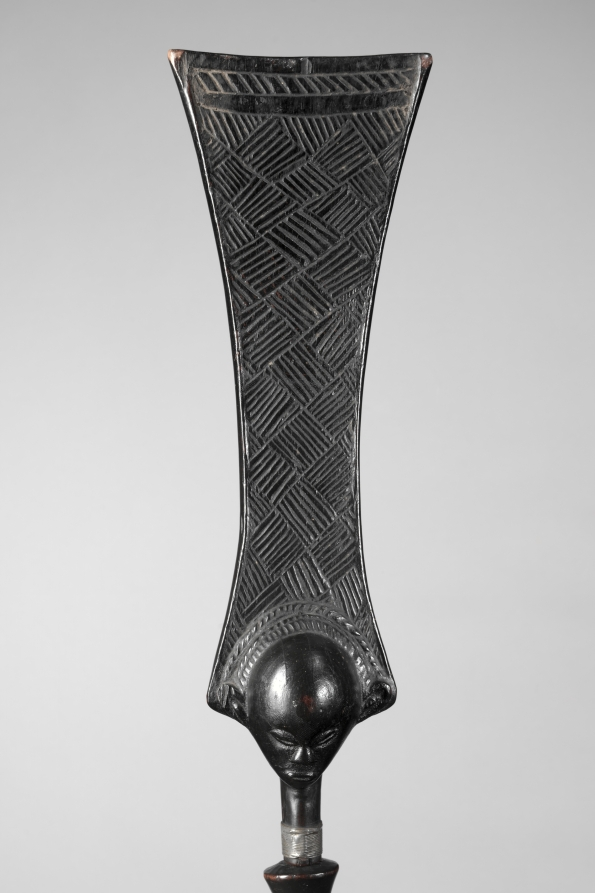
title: Staff of Office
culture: Central Africa, Democratic Republic of the Congo, Luba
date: early to mid-1800s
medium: Wood and iron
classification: Sculpture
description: Sanctified by a ritual specialist and enhanced with medicinal substances, the staff possessed supernatural qualities and was endowed with healing power. Luba staffs are among the most important regalia of Luba kings. The metal point alludes to the kingdom's stability and durability. Each staff has its own distinctive iconography to reflect regional styles. As Chief Msidi (former owner of this staff) ruled over the Yeke kingdom (and not the Luba kingdom), it begs the question of how he acquired this symbol of another realm's power.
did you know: The Yeke kingdom ruler Chief Msidi gave this as a gift of appreciation to the British missionary Frederick Stanley Arnot, whom the chief had invited to his kingdom.